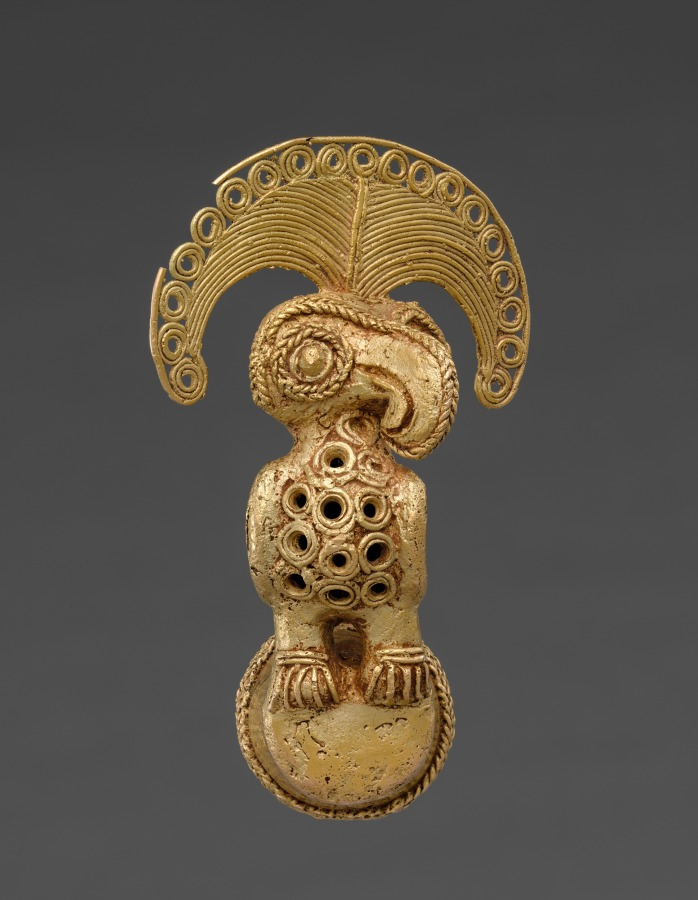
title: Finial with Bird (Harpy Eagle with Royal Flycatcher Crest?)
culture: Isthmian Region (Colombia), Sinú (Zenú), 5th century-11th century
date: 400–1000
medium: gold, cast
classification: Metalwork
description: This gold finial fit over the end of a staff, an emblem of rank. The bird has the hooked beak of a raptor—perhaps the harpy eagle, the “king” of tropical forests. The enormous crest, however, may be inspired by the Royal Flycatcher, a smaller bird that fans its unique, brilliantly colored crest during mating.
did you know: A museum visitor corrected our identification of this bird!